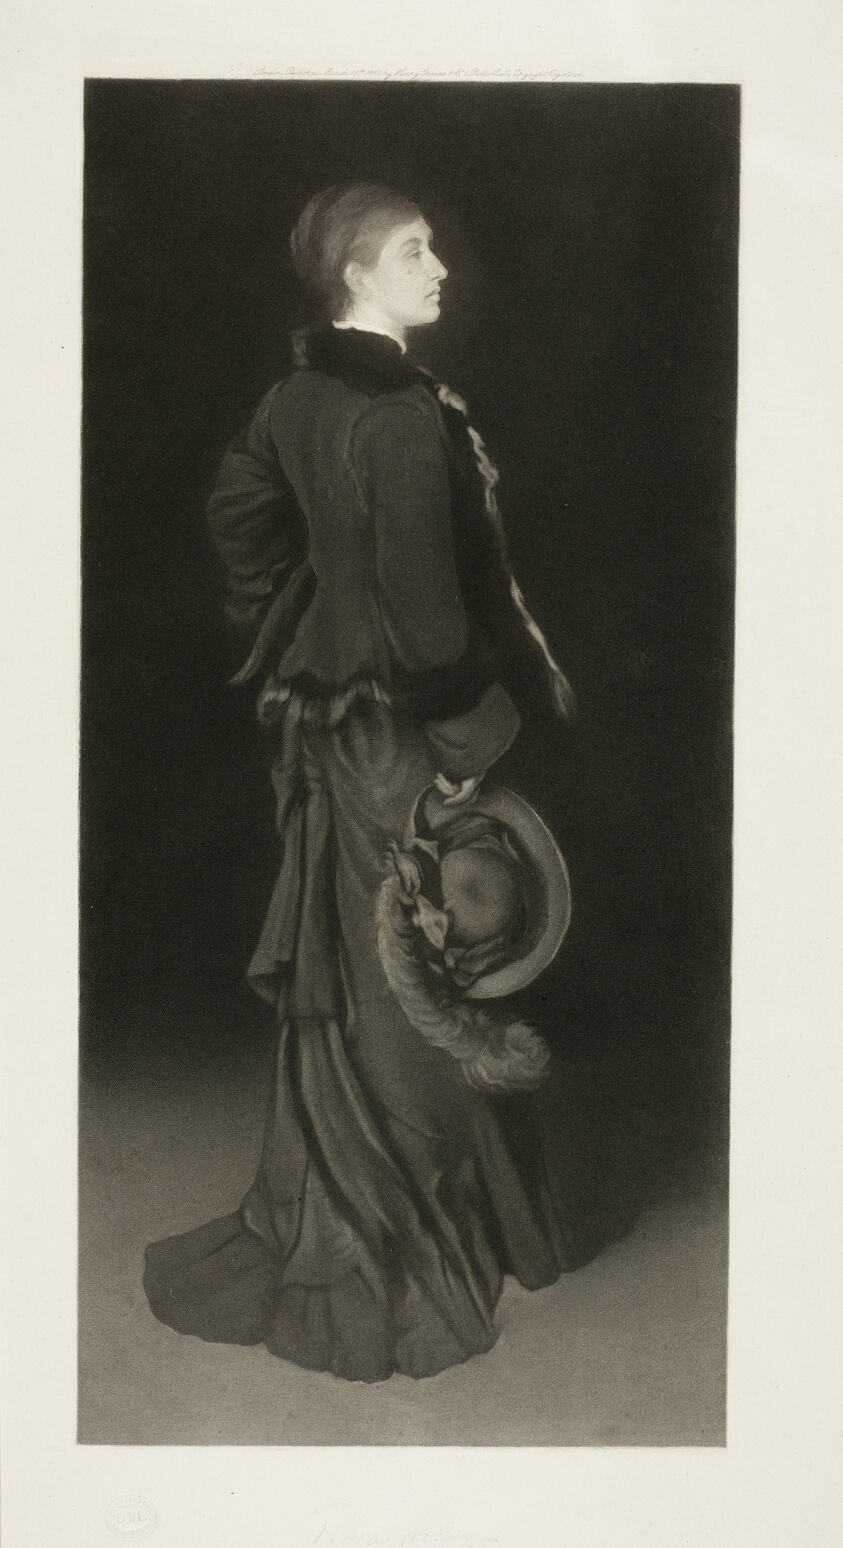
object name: Print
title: Rosa Corder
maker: Richard Josey (English, 1840-1906); after James McNeill Whistler (American, 1834-1903)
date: March 15, 1880 (published)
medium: Mezzotint on cream wove China paper, laid down on ivory wove paper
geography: England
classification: mezzotint; print; prints and drawing